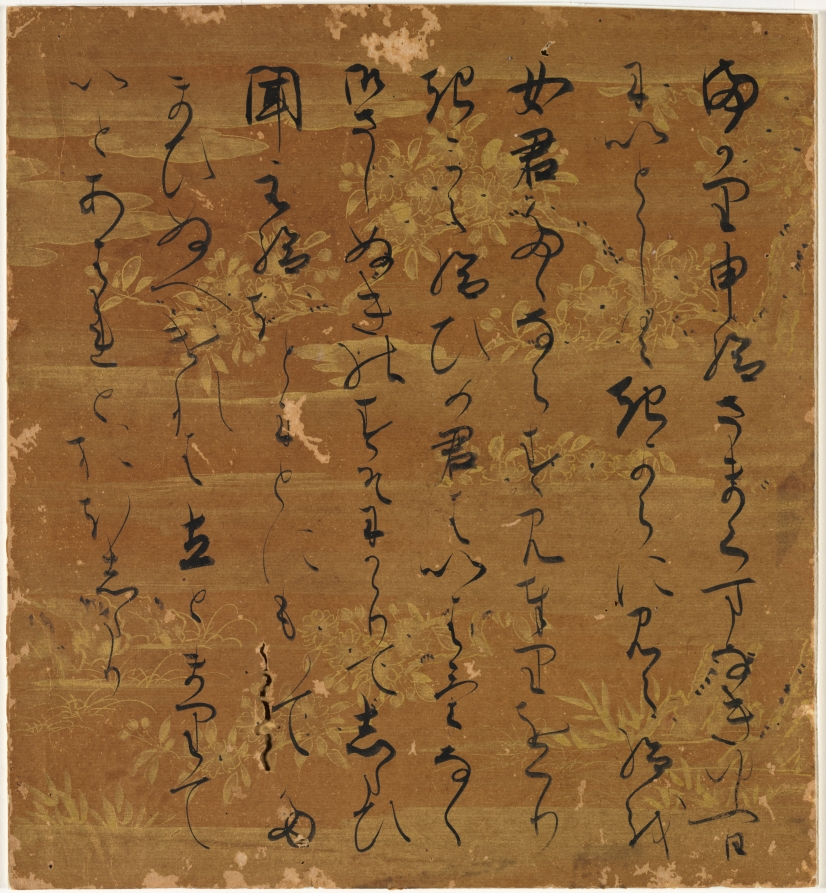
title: Portion of Text from the "Wisps of Cloud" (Usugumo) Chapter of The Tale of Genji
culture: Japan, Edo period (1615–1868)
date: 1600s-1700s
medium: album leaf; ink on dyed paper with gold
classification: Calligraphy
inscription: まかり申給さま、くまなきゆふ日 に、いとゝしくきよらにみえ給を、 女君たゝならずみ奉りをくり きこえ給。ひめ君はいはけなく 御さしぬきのすそにかゝりてしたひ 聞え給ほどに、とにもいでた まひぬべければ、立とまりて いとあはれとおぼしたり。 Transcription by Stephen Forrest (kana modernized, punctuation added).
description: The calligraphy brushed on this paper, decorated with a cherry tree seen through clouds, narrates a portion of The Tale of Genji. A scene often illustrated in painted albums and later woodblock prints, it describes Genji taking leave of his love, Murasaki, to see the Akashi Lady, his other love, whose daughter, now in Murasaki's care, clings to Genji's hem as he moves to depart.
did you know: Some say The Tale of Genji is the world's first novel.